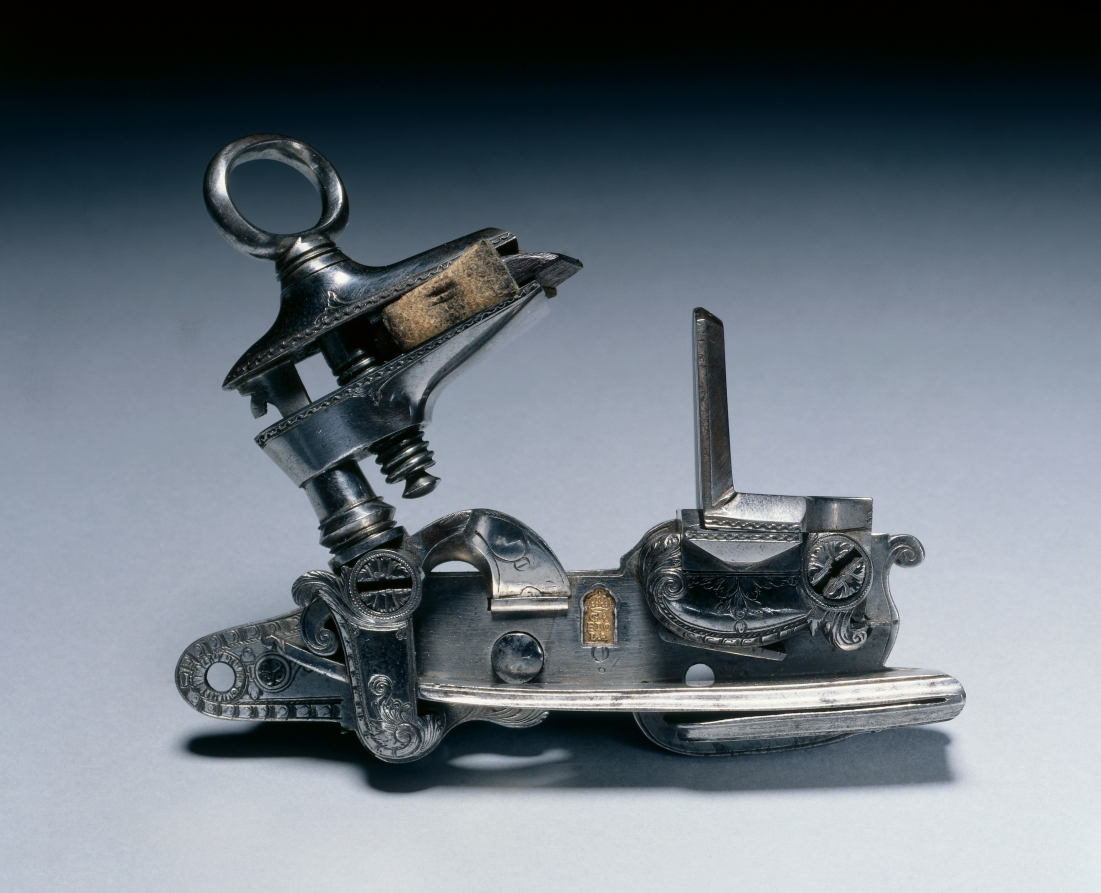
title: Miquelet Lock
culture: Spain, Eibar, late 18th Century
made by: Domingo Gabiola (Spanish)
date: c. 1790–1800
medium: steel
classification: Arms and Armor